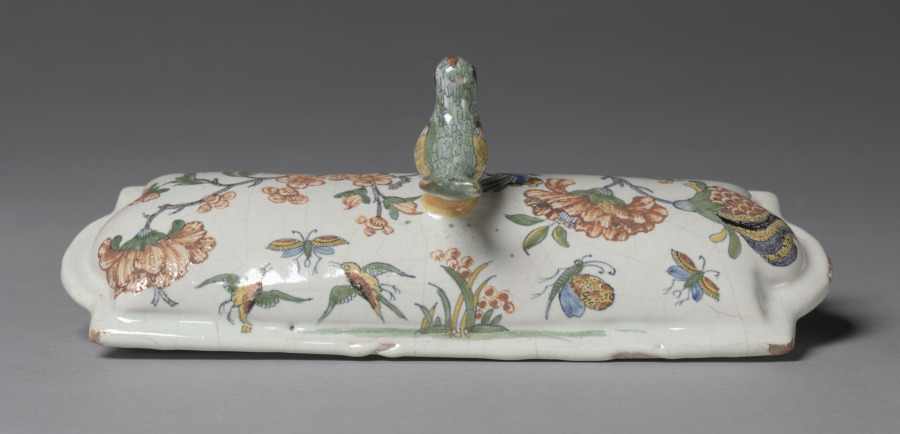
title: Lid from Writing Stand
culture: France, Sinceny, 18th century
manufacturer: Sinceny Factory (French)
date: 1746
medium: Tin-glazed earthenware (faience) with enamel decoration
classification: Ceramic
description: The faience factory at Sinceny was an offshoot of that at Rouen. In style, Sinceny closely resembles later Rouen wares with polychrome decoration. The stylized flowers and insects which decorate this writing stand are entirely typical of Sinceny faience.